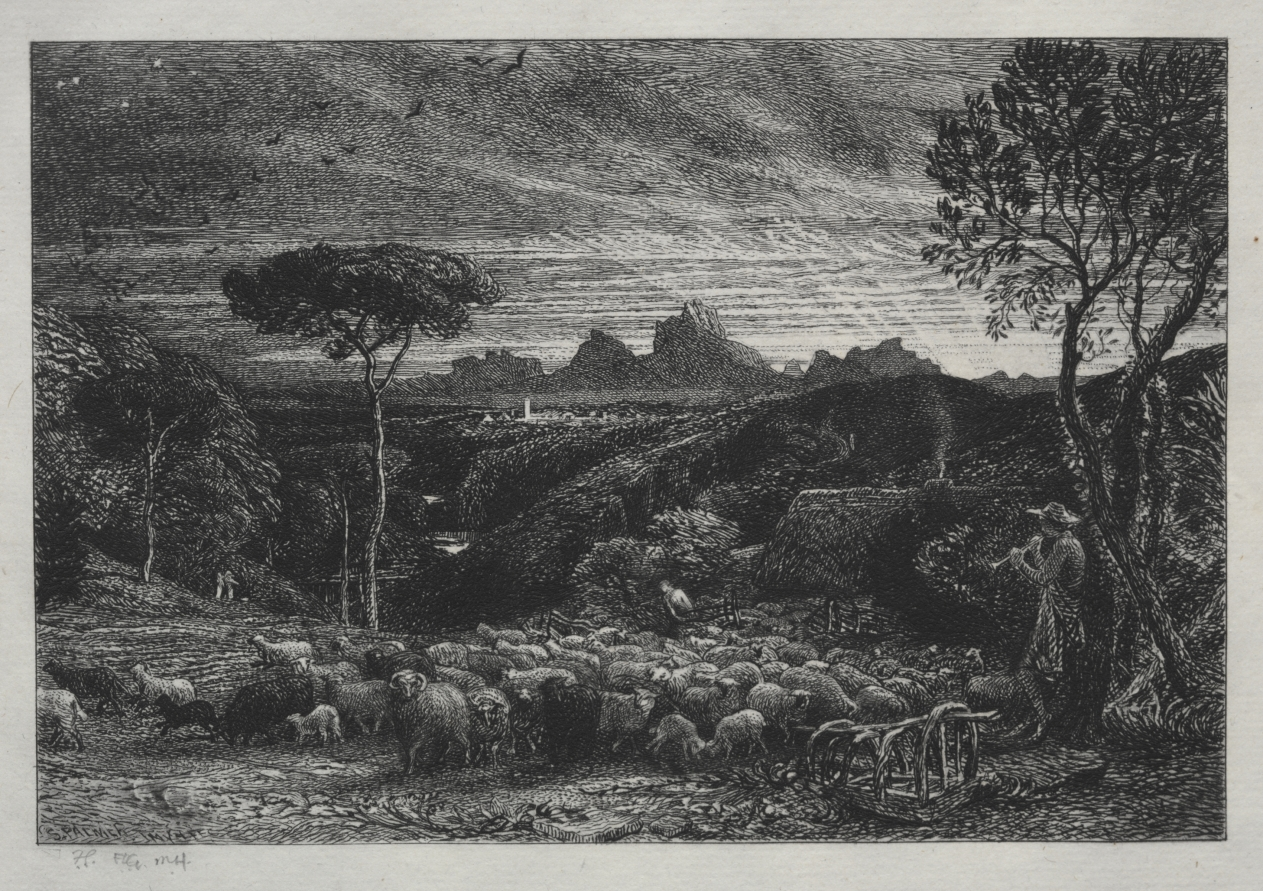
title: Opening the Fold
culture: England, 19th century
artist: Samuel Palmer (British, 1805–1881)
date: 1880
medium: etching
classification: Print